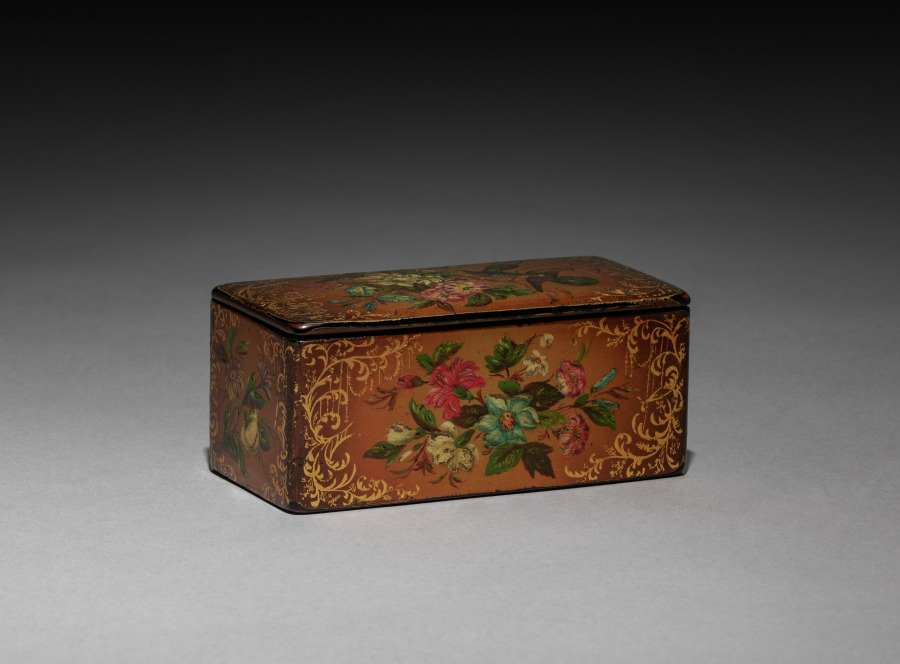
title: Box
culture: Russia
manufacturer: Lukutin Factory (Russian, 1818–1904)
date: 1830–81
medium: lacquered wood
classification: Miscellaneous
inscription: inscription on interior.